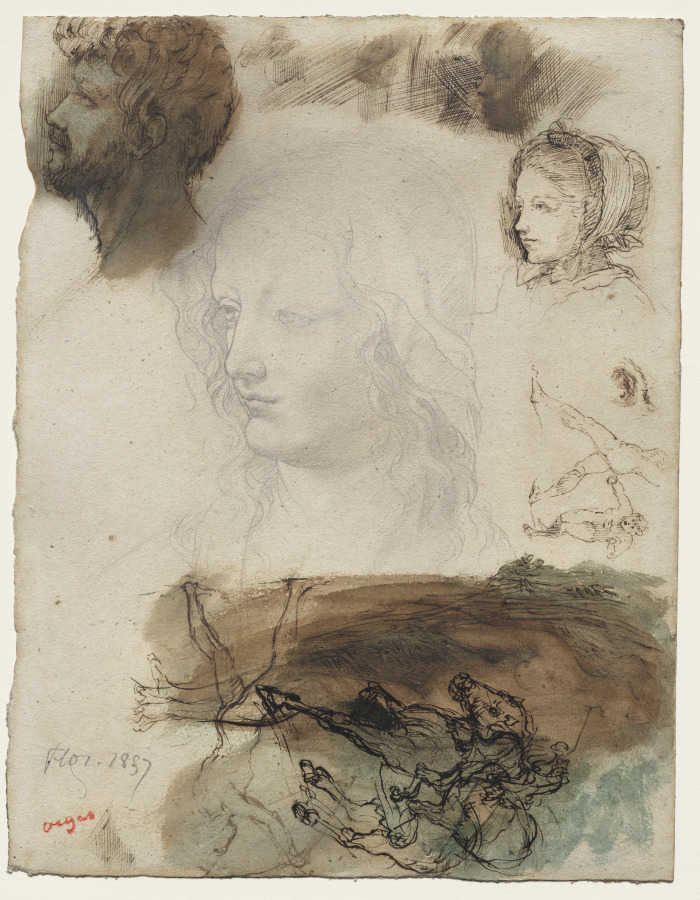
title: Sheet of Studies and Sketches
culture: France, 19th century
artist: Edgar Degas (French, 1834–1917)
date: 1858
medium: graphite, pen and dark brown ink, and watercolor on thick ivory wove paper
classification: Drawing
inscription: Inscribed, lower left, in graphite: Flor. 1857; stamped, lower left, in red ink: artist’s stamp [Lugt 658]; verso, in red ink: estate stamp [Lugt 657]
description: Degas traveled to Florence, Italy, in July 1858, where he made this sheet of studies. The featured imagery is fragmented and dissociated, suggesting the young artist's engagement with art of the past. The refined female head drawn at center in graphite was copied from a drawing then attributed to Leonardo da Vinci in the Uffizi Gallery's collection. Other sketches record Degas's responses to Florentine sculpture. At upper right, he sketched an informal portrait of his cousin Giulia Bellelli, probably from life.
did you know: The date Degas wrote on this drawing is incorrect; he didn't visit Florence until 1858, and must have inscribed the sheet years later.